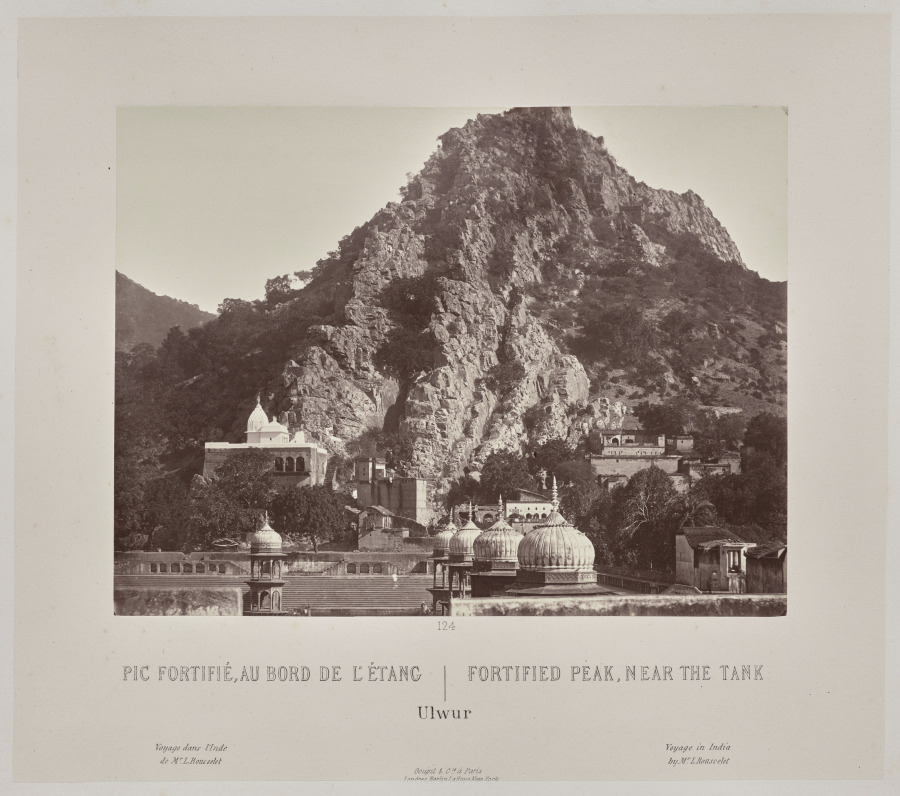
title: Fortified Peak, Near the Tank, Ulwur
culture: France, 19th century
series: India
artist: Louis-Théophile Marie Rousselet (French, 1845–1929)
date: 1865–68, published 1869–70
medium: Albumen print from glass plate negative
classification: Photograph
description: Concerned that his drawings did not do justice to the splendor of India’s monuments, Rousselet learned photography in India that year, a remarkable accomplishment. He proved to be a talented photographer with a sophisticated sense of composition. The scenes in this volume sweep across sites of Sultanate, Rajput, and Mughal power in northern India, from the sacred Hindu city of Varanasi on the Ganges River to Alwar in Rajasthan. Also included are several scenes of industry and portraits of Indian rulers.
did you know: Louis Rousselet described himself as a “scientific traveler” when he went to India alone at age 18 in 1863 and stayed into 1868.